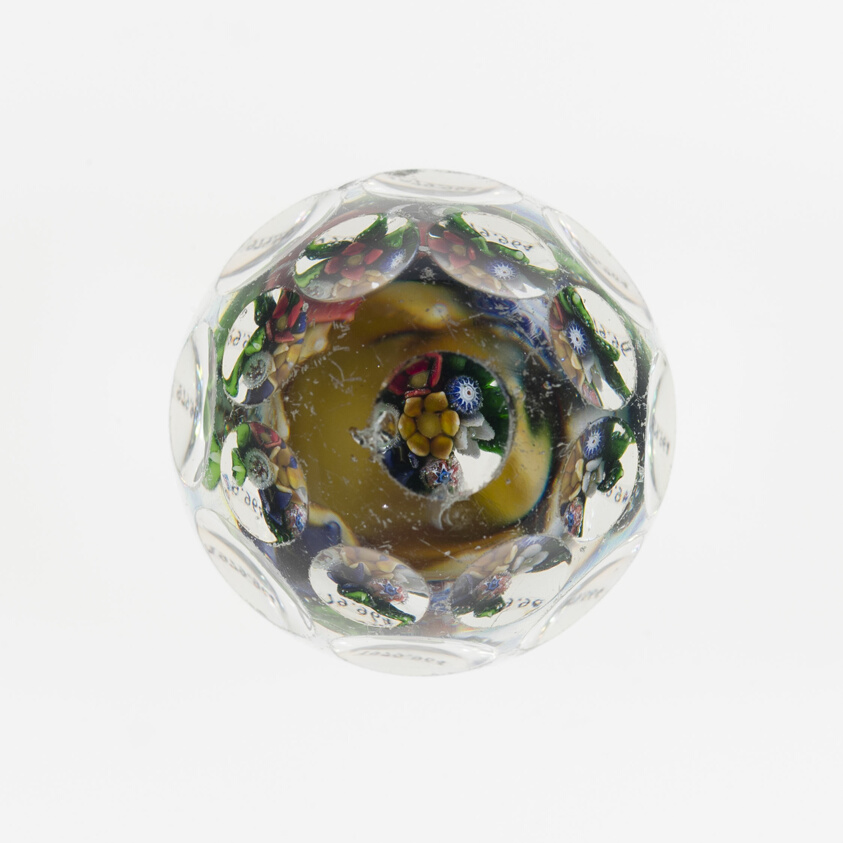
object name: Glass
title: Handcooler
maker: Saint-Louis Glassworks (Cristalleries de Saint-Louis); Lorraine, France, founded 1586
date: c. 1848–55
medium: Glass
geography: Saint-Louis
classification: paperweight; lampwork; glass; european decorative arts